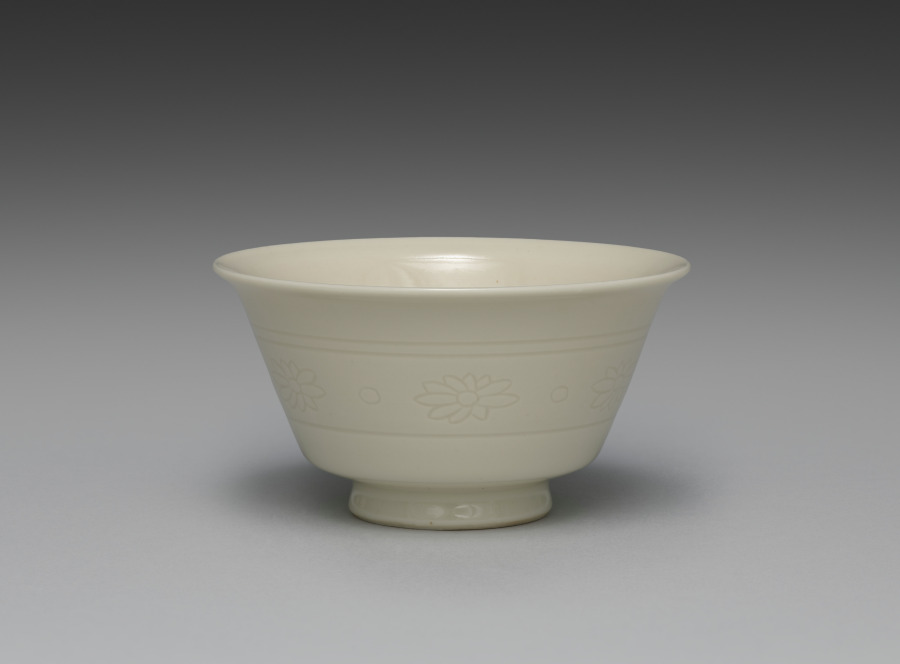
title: Teacup from Teacups with Floral Band Motif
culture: Japan, Meiji period (1868–1912)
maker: Seifū Yohei III (Japanese, 1851–1914)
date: 1893–1914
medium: One from a set of five cups; porcelain with incised decoration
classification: Ceramic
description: The five sencha teacups in this set are decorated with incised flowers and dots between a double band at the top and a single band at the bottom. They are in Yohei III’s creamy taihakuji body and glaze. In their motifs, they are quite similar to an incense burner by Yohei III (see CMA 2022.180), but the flowers are even more simple in design, with no open circle at the center. A label affixed to the side of the box refers to them as “sencha cups in emulation of Korean white [ware].” The reference to Korean ware indicates that even though Yohei was more directly inspired by Qing-dynasty wares from the Dehua kilns in Fujian Province in developing his porcelain clay and glaze for works such as these, the general understanding of the continental models still placed them, at least in terms of color, among pieces broadly associated in Japan with Korean white wares. The delicate cups are thinly potted, so they have a highly desirable translucency.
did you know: The delicate cups in this set are thinly potted, so they have a highly desirable translucency.